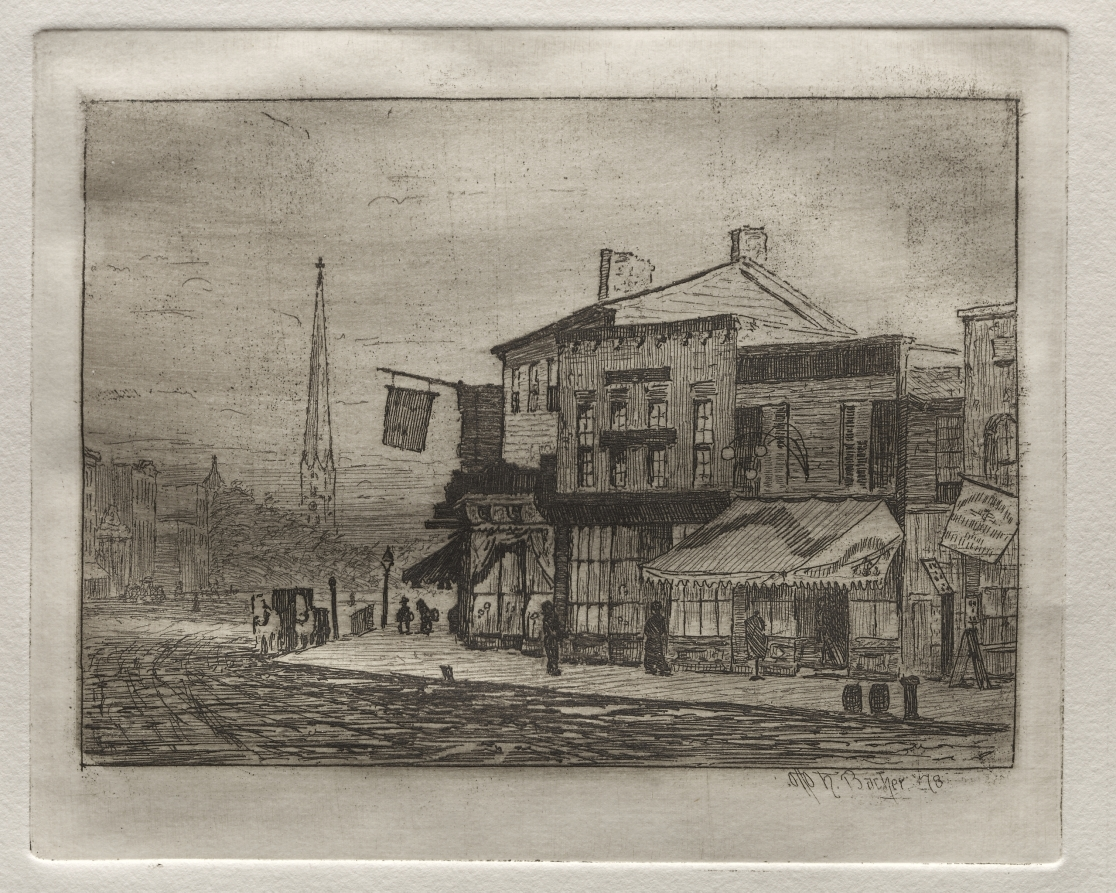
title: Eagle Street and Woodland Avenue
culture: America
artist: Otto H. Bacher (American, 1856–1909)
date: 1878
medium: etching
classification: Print